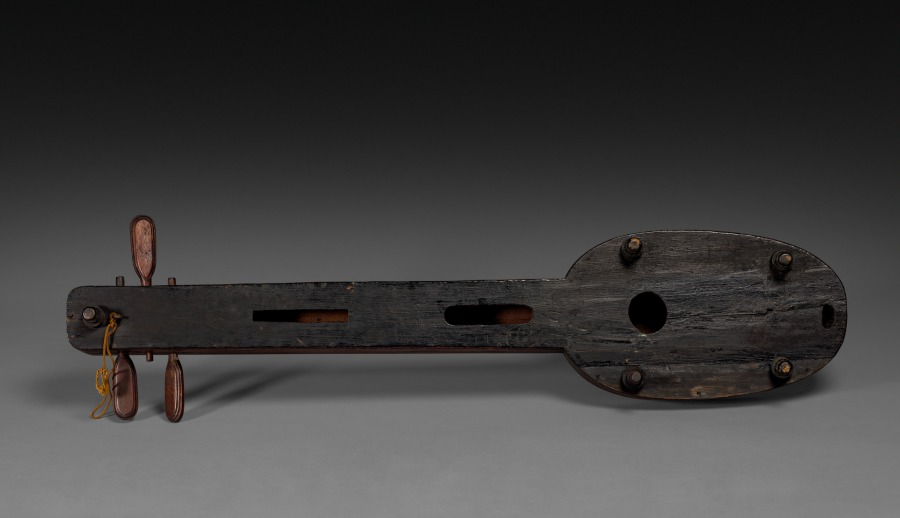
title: Ta'khe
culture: Cambodia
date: 1800s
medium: Tropical hardwood with ferrous metal and silk strings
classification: Musical Instrument